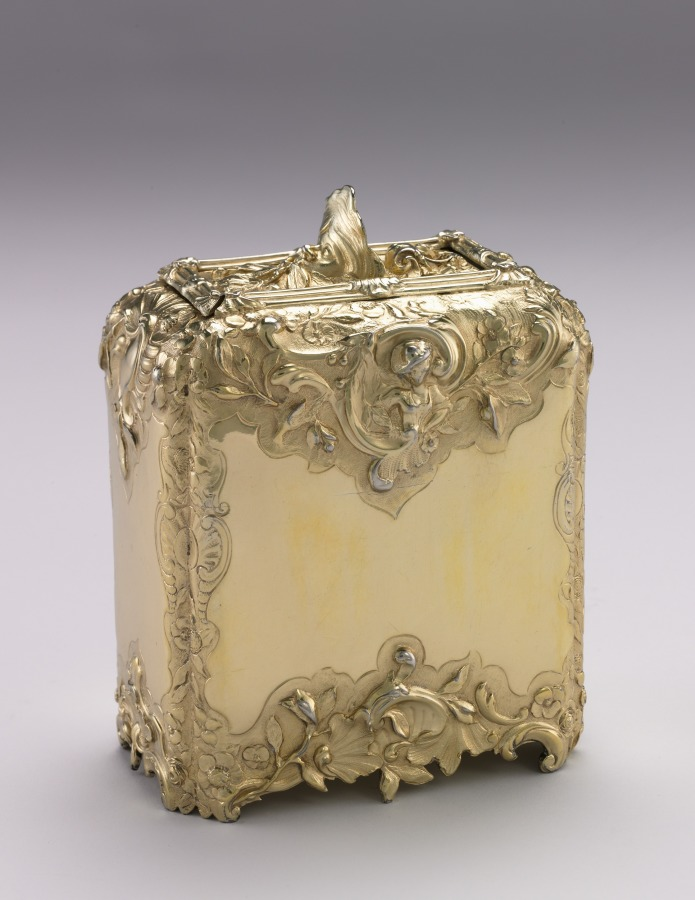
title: Tea Caddy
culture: England, London, 18th century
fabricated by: Paul Jacques de Lamerie (British, 1688–1751)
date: 1741–1742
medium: silver gilt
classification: Silver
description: In the 1600s and 1700s, silver played a significant role in projecting wealth, status, power, and ritual in British life. Tea was likewise a highly valued commodity, and as such, silver caddies like this one were designed to display the social distinction of its owner. This canister’s prominently sloping shoulders were designed by Paul Jacques de Lamerie in the early 1730s and became a standard form for tea caddies by the end of the decade.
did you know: The curving shape of this tea caddy is echoed by the scrolling lines and swirling naturalistic ornament on all four sides.